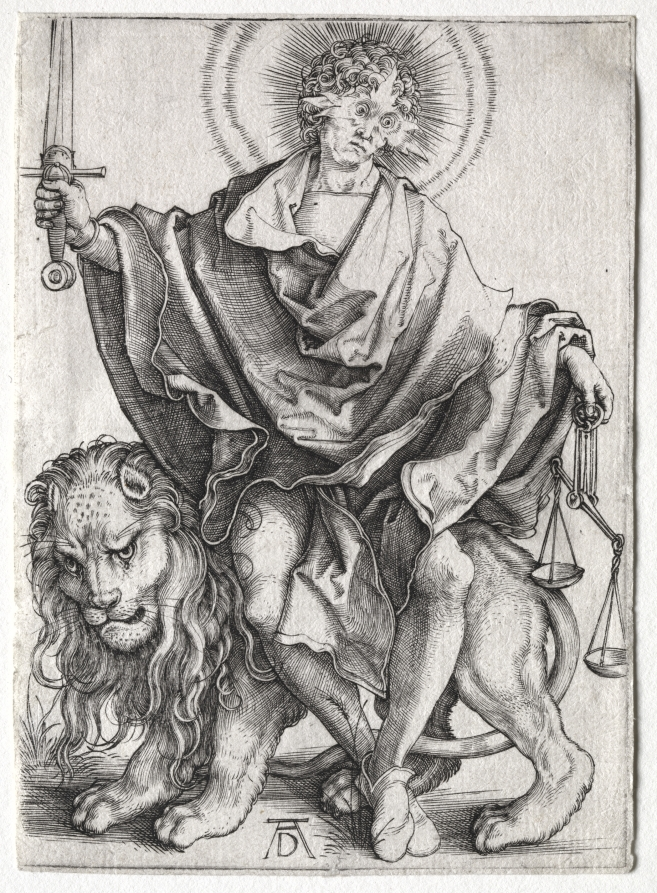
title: Son of Righteousness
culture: Germany, late 15th-early 16th Century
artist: Albrecht Dürer (German, 1471–1528)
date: c. 1500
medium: engraving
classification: Print